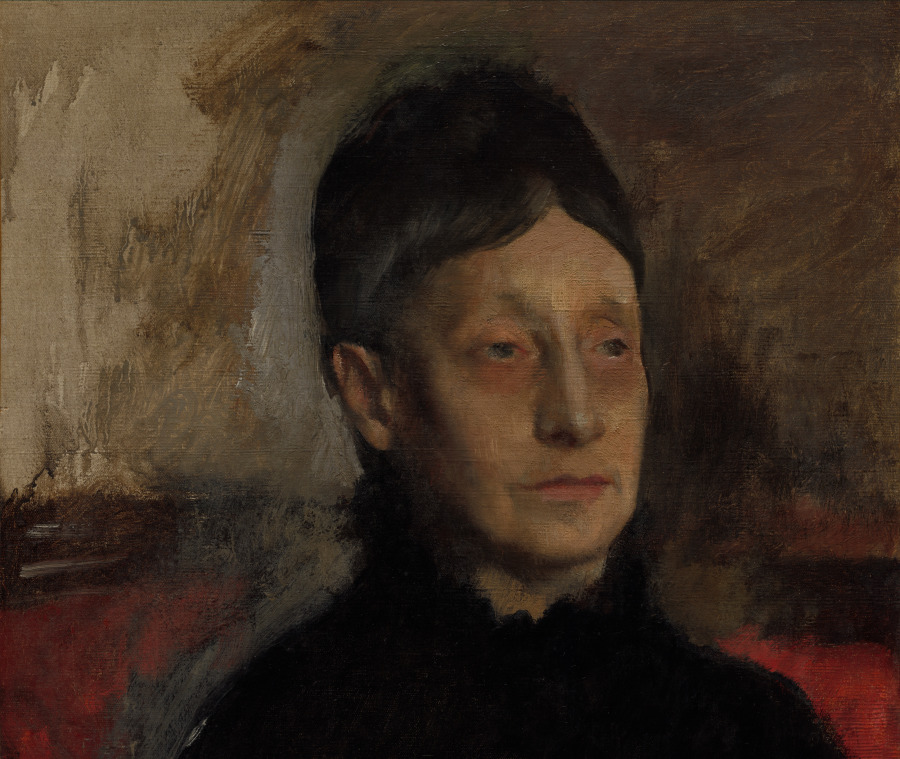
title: Stefanina Primicile Carafa, Marchioness of Cicerale and Duchess of Montejasi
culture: France, 19th century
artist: Edgar Degas (French, 1834–1917)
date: c. 1875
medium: oil on fabric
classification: Painting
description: Although best remembered for his depictions of ballet dancers and race horses, Degas painted many likenesses of his family members. He probably painted this portrait of his aunt, Stefania Carafa (1819–1901), during an extended visit to Naples, where many of his relatives lived. Described in family papers as a highly indulged, fun-loving child, the duchess grew into the stoic, world-weary woman depicted here. No expensive finery reveals her high social rank; indeed she wears a mourning dress, possibly to observe the recent death of her brother Achille.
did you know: Degas was a Parisian by birth, but had family connections around the world, including New Orleans and Italy. In this portrait Degas's aunt, who was a titled member of the aristocracy in southwestern Italy, is captured in loose, flowing strokes with her mourning dress and watery-eyed gaze.